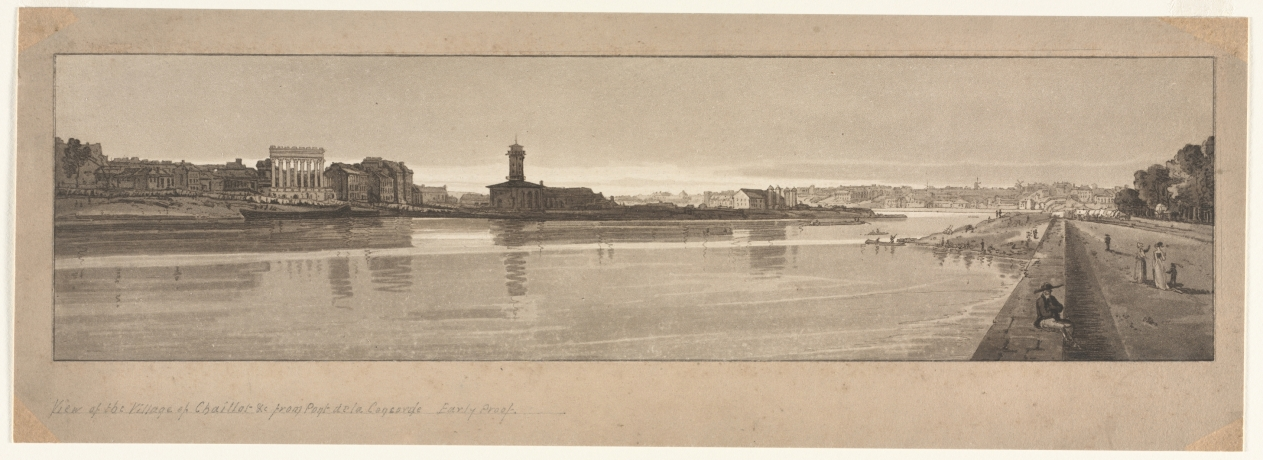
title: A Selection of Twenty of the Most Picturesque Views in Paris: View of the Village of Chaillot, &c taken from Pont de la Concorde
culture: England, 19th century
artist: Thomas Girtin (British, 1775–1802)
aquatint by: Frederick Christian Lewis (British, 1779–1856)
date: 1802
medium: softground etching and aquatint, printed in brown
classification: Print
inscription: Lower margin, in pencil: View of the Village of Chaillot from Pont de la Concorde Early proof